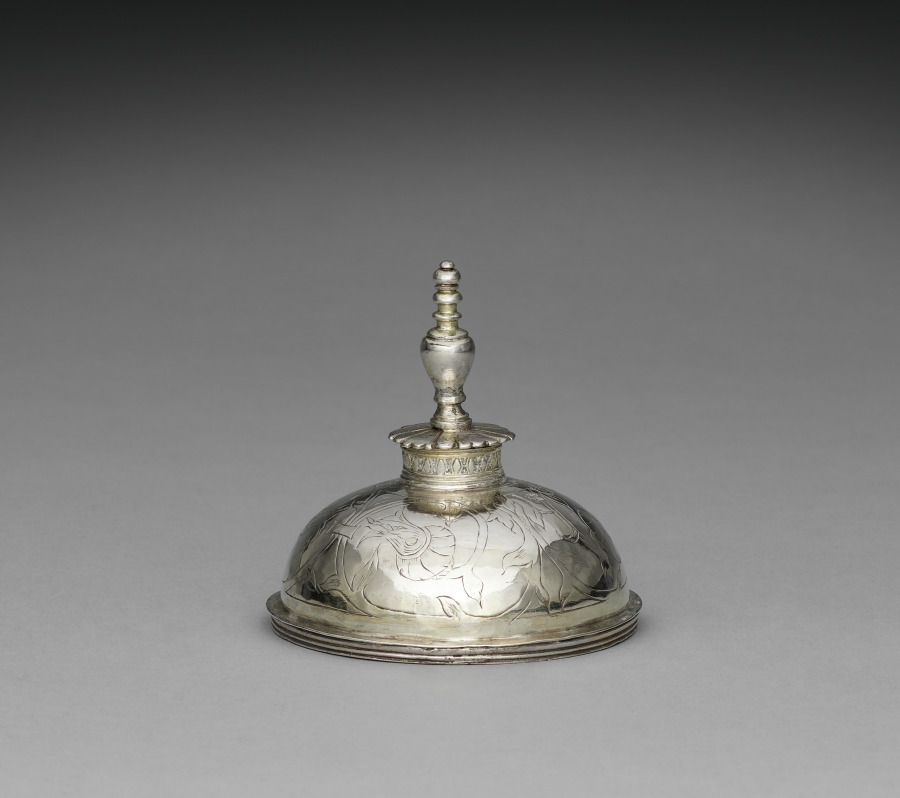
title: Cover for a Standing Cup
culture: London, England, late 16th century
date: 1593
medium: silver, partially gilt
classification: Silver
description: Produced during the last years of the Tudor dynasty (1485–1603), this lid and the accompanying vessel exemplify the symmetrical patterns, horizontal designs, and clear division of space typical of English silverwork at the time. The functional shape and ornamental designs characteristic of standing cups made them ideal for ceremonial occasions.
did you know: This is the lid to a standing cup. See cover record.